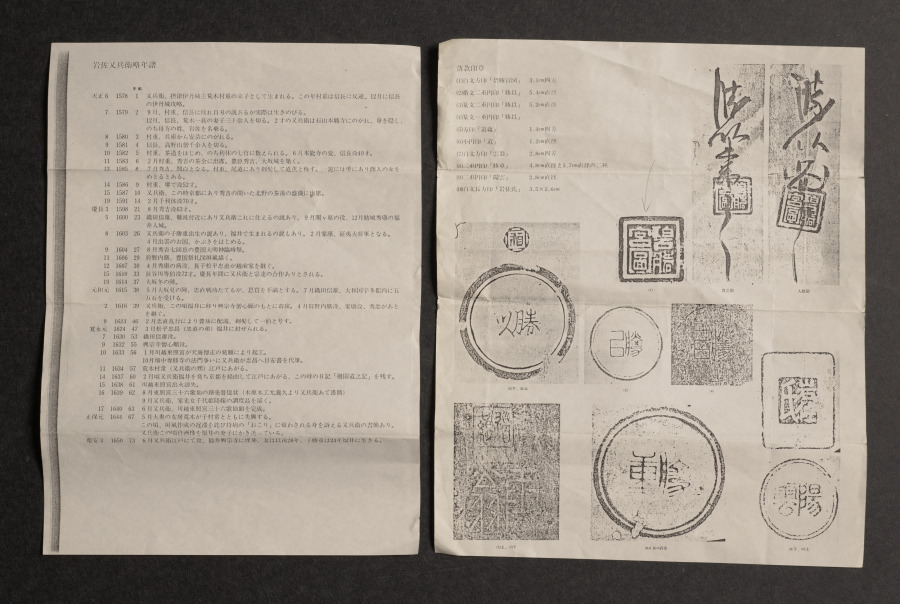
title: Coastal Landscape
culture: Japan, Momoyama period (1573–1615)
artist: Iwasa Matabei (Japanese, 1578–1650)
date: 1573–1615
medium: hanging scroll; ink on paper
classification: Painting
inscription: signed: signature unread